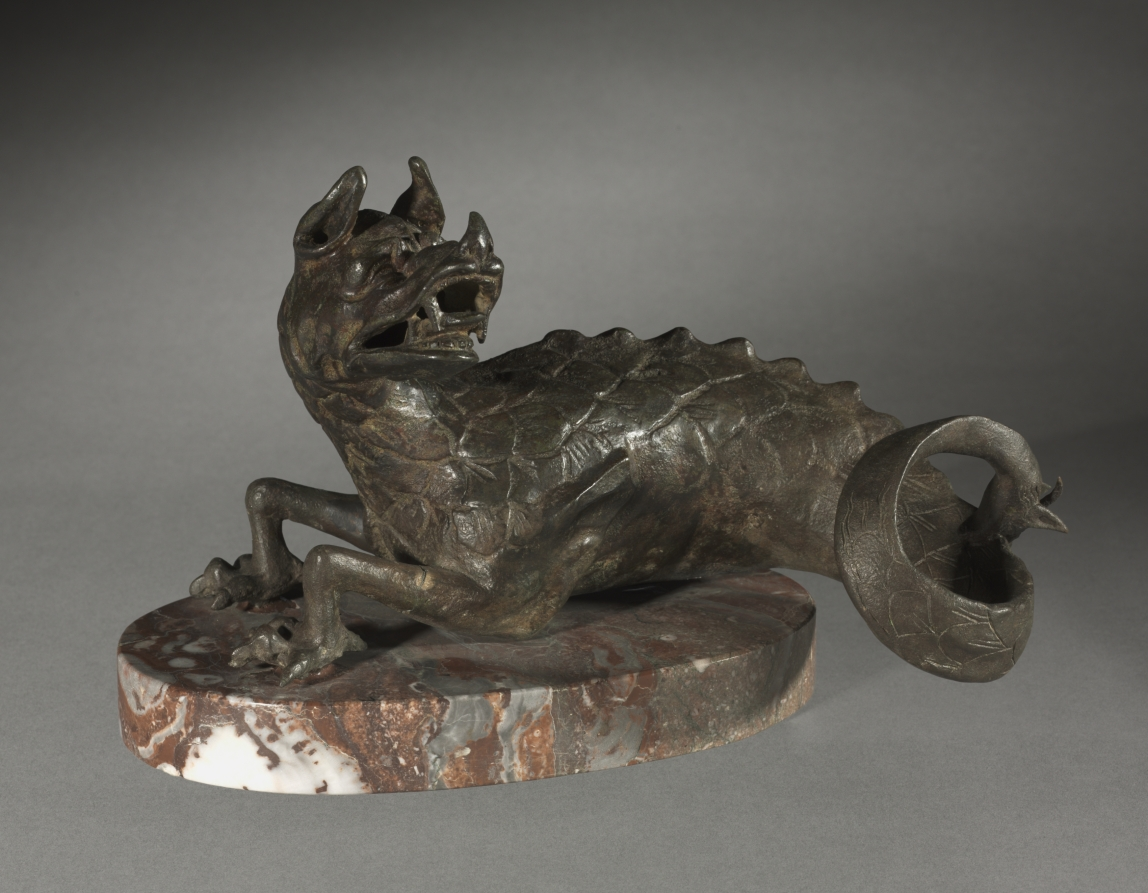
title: Dragon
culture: Italy, 18th century or later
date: 1700s or later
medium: bronze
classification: Sculpture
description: This figure was probably originally meant to serve as the decorative foundation to a larger object such as a casket or urn. In transition from decorative motif to independent work of art, the nether half may have been an addition, evidenced by the seam along its torso.